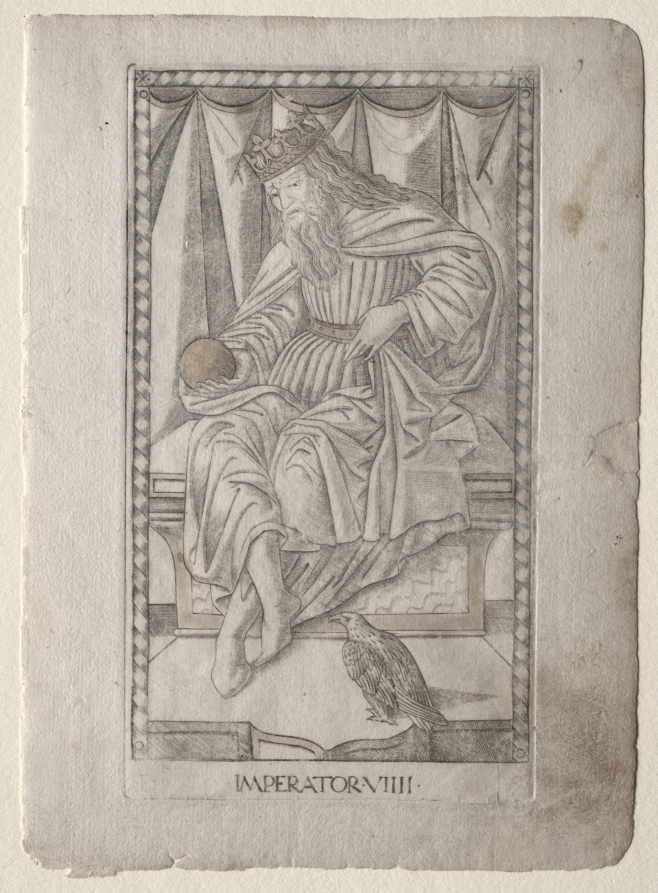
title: The Emperor (from the Tarocchi, series E: Conditions of Man, #9)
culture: Italy, Ferrara, 15th century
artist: Master of the E-Series Tarocchi (Italian, active 1460s)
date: before 1467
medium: engraving hand-colored with gold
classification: Print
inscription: Lettered below the image of Imperator (The Emperor): [·E·] / ·EMPEROR·VIIII / [·9·]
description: This engraving is part of the Tarocchi group marked with the letter “E,” and named Conditions of Man. This series outlines the social and hierarchical order of ten characters (Beggar, Servant, Artisan, Merchant, Gentleman, Knight, Doge King, Emperor, and Pope), starting from the lower grade and ending with the most important one. Here, Imperator (The Emperor) is shown as a full-length crowned male figure, turned to the left. The ruler is seated crossed-legged on his throne. He holds a globe in his right hand, while an eagle rests at his feet.